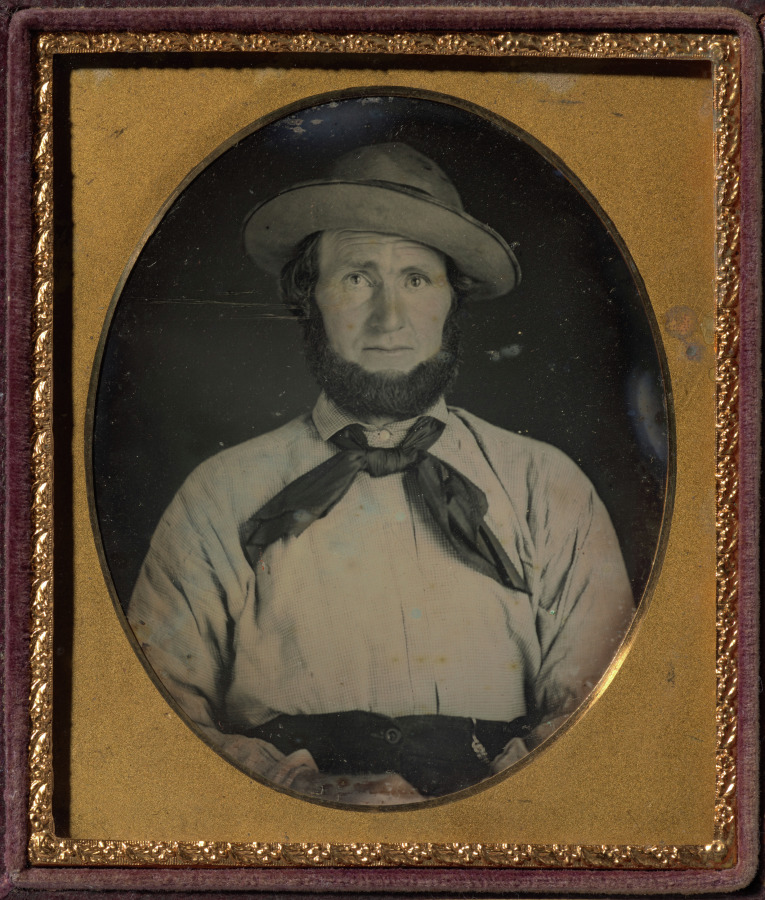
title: Miner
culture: America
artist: Robert H. Vance (American, 1825–1876)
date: c. 1853–55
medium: daguerreotype, sixth plate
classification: Photograph